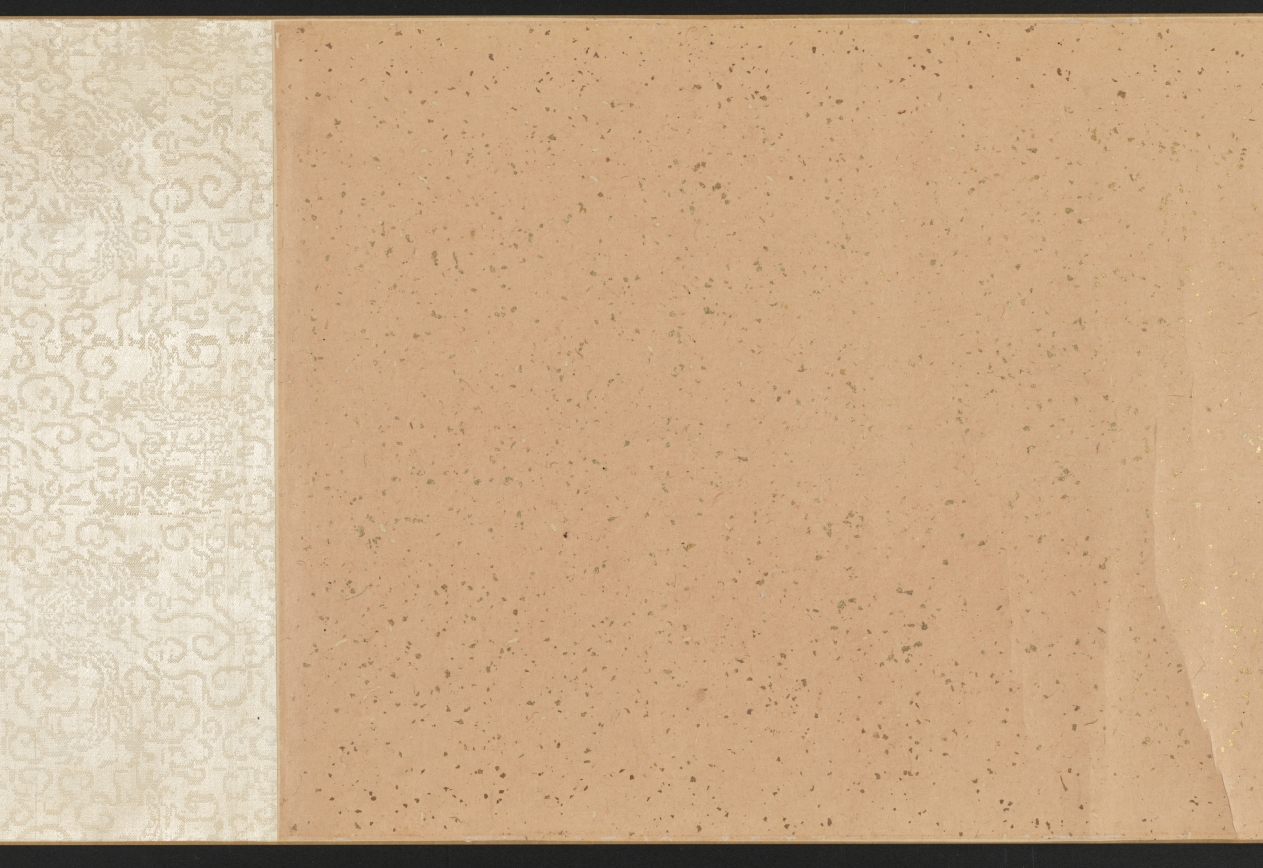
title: Scholar-Hermits in the Autumn Mountains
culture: China, Ming dynasty (1368–1644)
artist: Tang Yin (Chinese, 1470–1523)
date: 1500–1510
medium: handscroll, ink and light color on silk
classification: Painting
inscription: Artist's signature and 2 seals at end of scroll: Tang Yin [seals] T'ang Po-hu; T'ang Tzu'wei t'u-shu.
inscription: Title on frontispiece by Li Cho-kung (dates unknown).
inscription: 1 colophon and 11 additional seals: 1 colophon dated 1915 of Wu Tso-hsi (19th-20th c.); 2 seals of Gao Qifeng 高奇峰 (1889–1933); 5 seals of C. C. Wang 王季遷 (1907–2003); 4 seals unidentified.